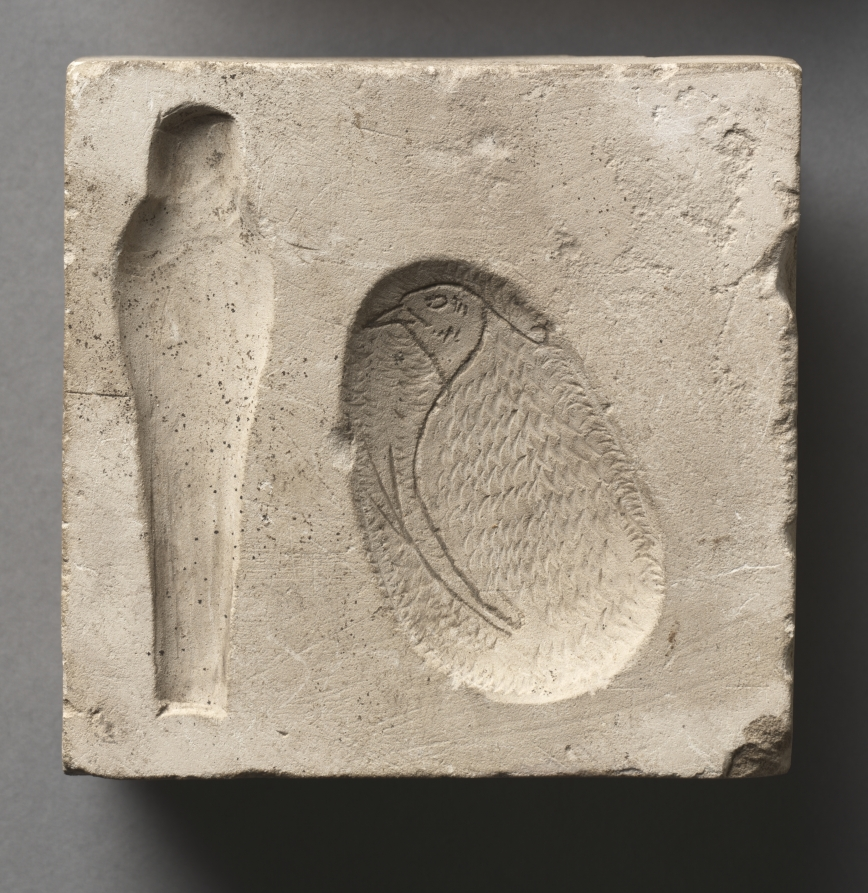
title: Mold in Two Parts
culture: Egypt, Greco-Roman period (332 BCE–395 CE), Ptolemaic dynasty (305–30 BCE) or later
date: 305–30 BCE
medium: limestone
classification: Sculpture